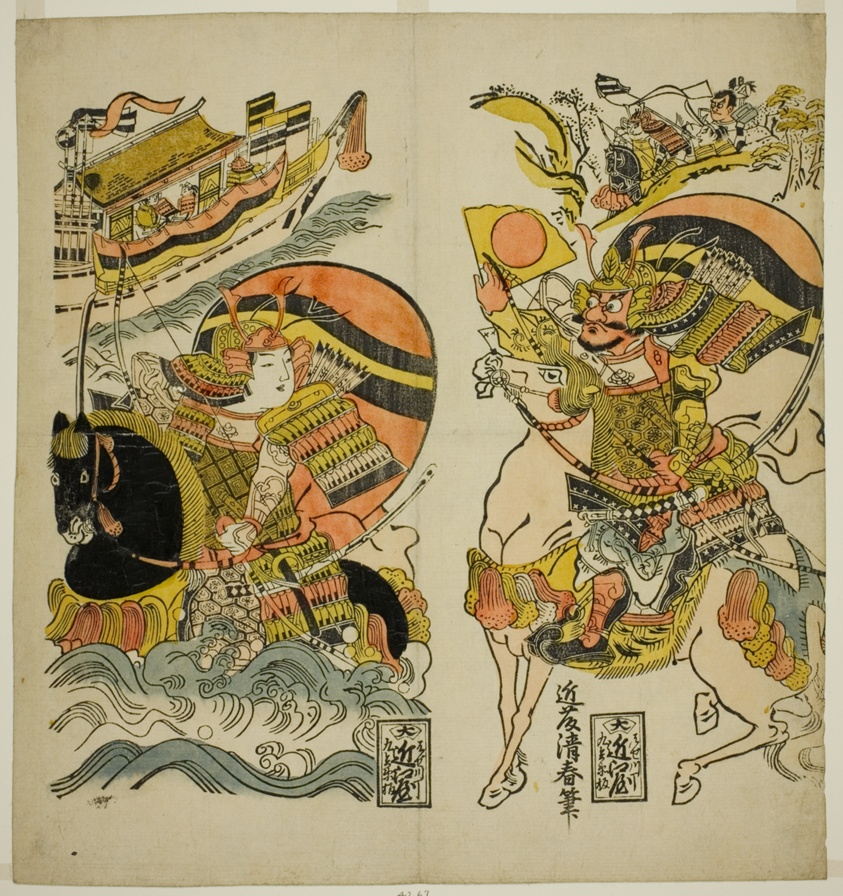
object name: Print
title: Kumagai Naozane and Taira no Atsumori at the battle of Ichi-no-tani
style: Japanese (culture or style)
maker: Kondo Kiyoharu (Japanese, active c. 1704-36)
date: c. 1720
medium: Hand-colored woodblock print; uncut hosoban diptych, urushi-e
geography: Japan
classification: woodblock print; print; asian art